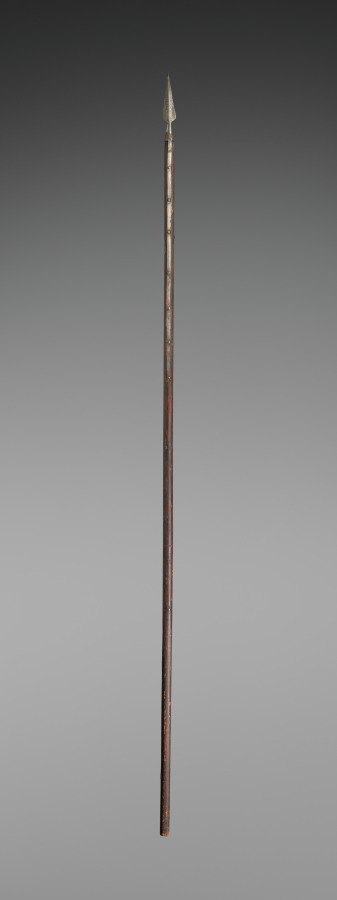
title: Pole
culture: Spain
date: 1700s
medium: wood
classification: Arms and Armor